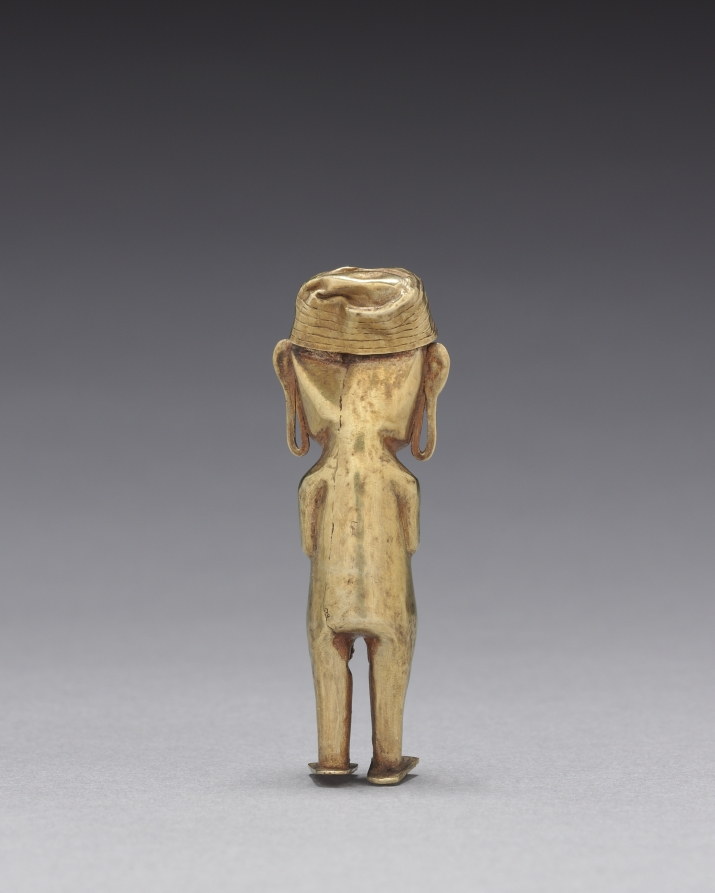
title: Male Figurine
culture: Peru, Lambayeque Valley, Inka style (1400-1532)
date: 1400–1532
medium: hammered gold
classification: Metalwork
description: Precious metal was a major Inka artistic medium, but most was melted down after the conquest to fund the Spanish court. The sole remains are small-scale objects from tombs and offerings. Figurines like this have been found at shrines on sacred mountain peaks, where they accompanied child sacrifices in offerings made during times of crisis, such as famine.